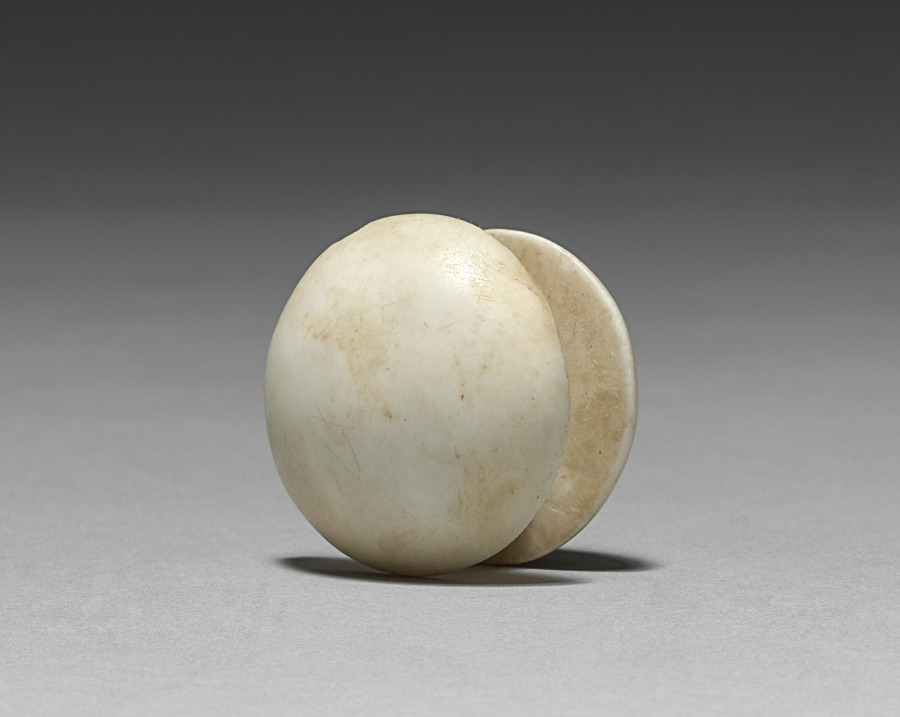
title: Pair of Earrings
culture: Egypt, New Kingdom (1540–1069 BCE), Dynasty 18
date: 1540–1296 BCE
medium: travertine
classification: Jewelry